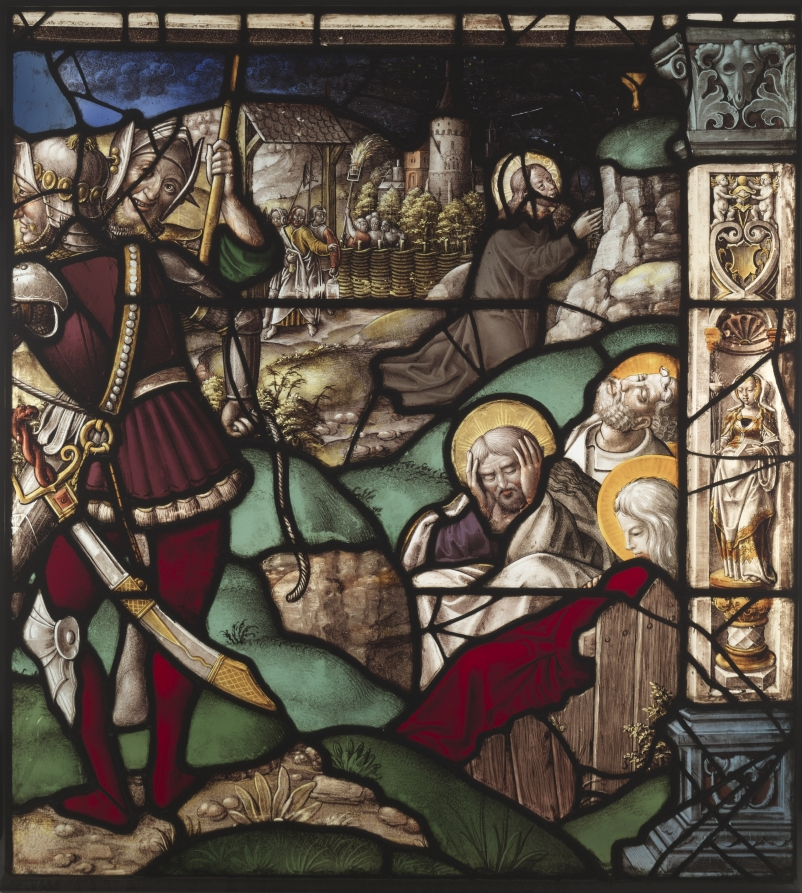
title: Christ in the Garden of Gethsemane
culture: Germany, Cologne, 16th century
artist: Everhard Rensig (German)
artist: or Gerhard Remisch (German)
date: 1522–26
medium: pot-metal and white glass, silver stain and sanguine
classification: Glass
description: These two stained glass panels originally belonged to an extensive program of Old and New Testament subjects that originally decorated the cloister of the Cistercian Abbey of Mariawald, near Cologne, Germany. The original placement of glass at Mariawald involved windows composed of two openings. Each comprised three large glass panels plus a smaller tracery panel. Two scenes in each window represented Old Testament subjects (below) and the New Testament (above). Above the biblical narrative panels were smaller messenger panels depicting images of prophets with scrolls. At the base of each window were donor and patron saint panels. In this way, the Old Testament was shown to prefigure the events of the New. These two panels depicting scenes of Christ’s Passion were originally located in the north corner of the east cloister gallery with the Kiss of Judas on the left, and Christ in Gethsemane on the right. Mariawald was founded in 1480 and closed in 1802 when the stained glass windows were removed. Other panels from the series are preserved in the Victoria and Albert Museum, London. Recent scholarship has attributed the glass to the Rhenish glass painters Everhard Rensig or Gerhard Remisch.